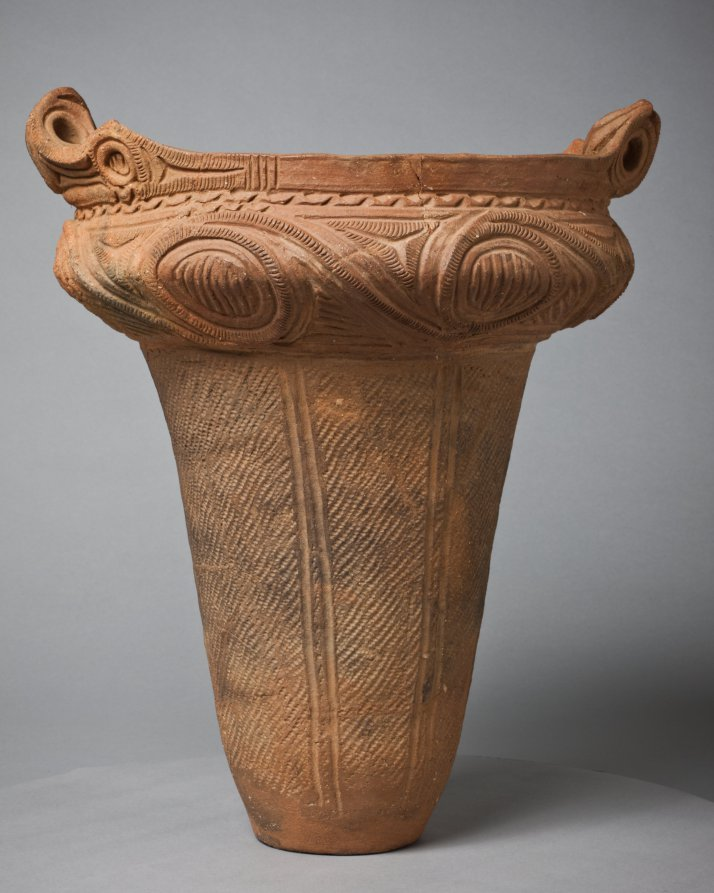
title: Urn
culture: Japan, Jōmon period (c. 10,500–300 BCE)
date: c. 2000 BCE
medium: earthenware, terracotta, impressed and incised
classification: Ceramic